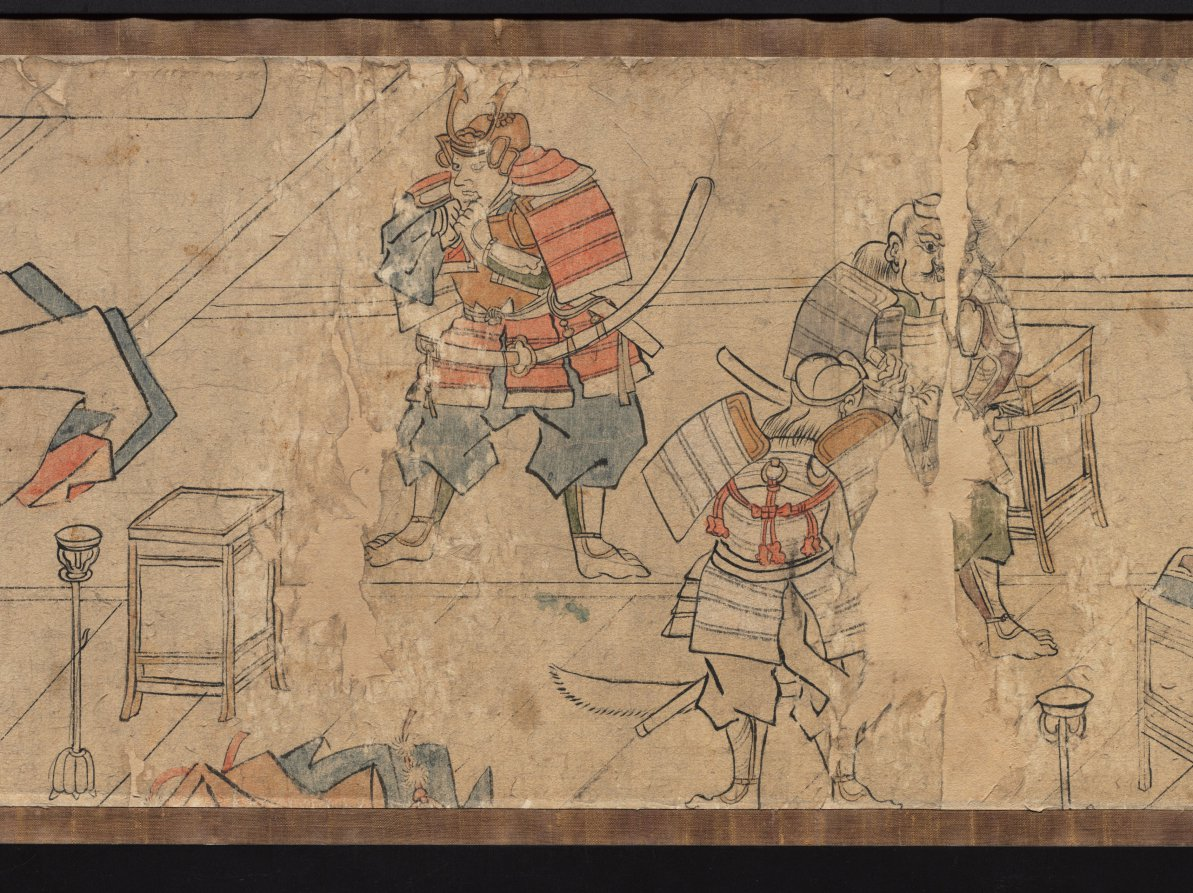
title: Oeyama Engi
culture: Japan, Edo period (1615–1868)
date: 1615–1868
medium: one of a pair of handscrolls; ink and color on paper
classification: Painting